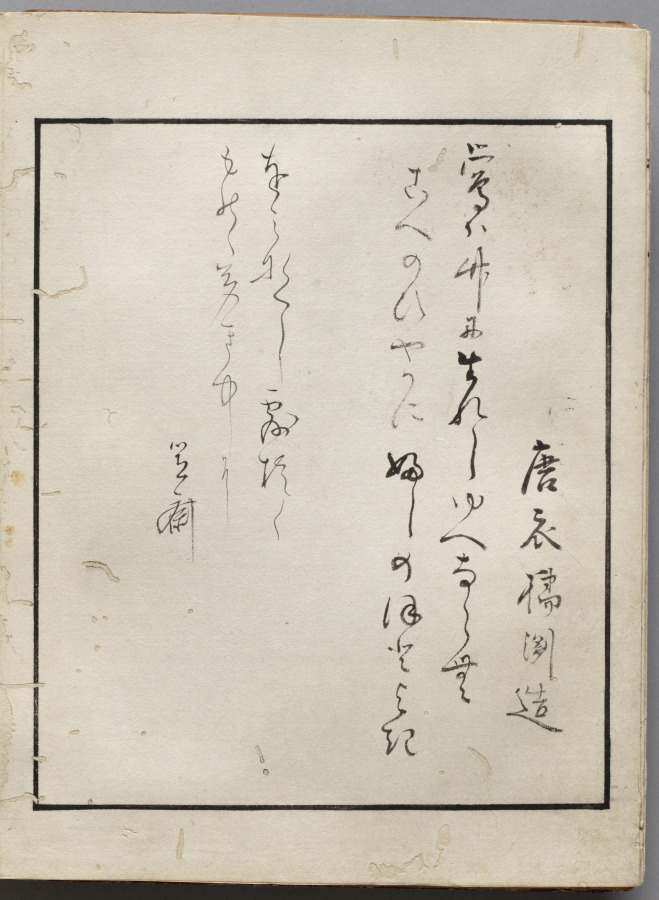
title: Double-Leaf from Album of Actor Portraits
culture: Japan, Edo period (1615–1868)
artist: Shōrakusai (Japanese)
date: c. 1790–1810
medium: double-leaf from an accordion-style album; ink on paper (left) and ink and color on silk (left)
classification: Bound Volume